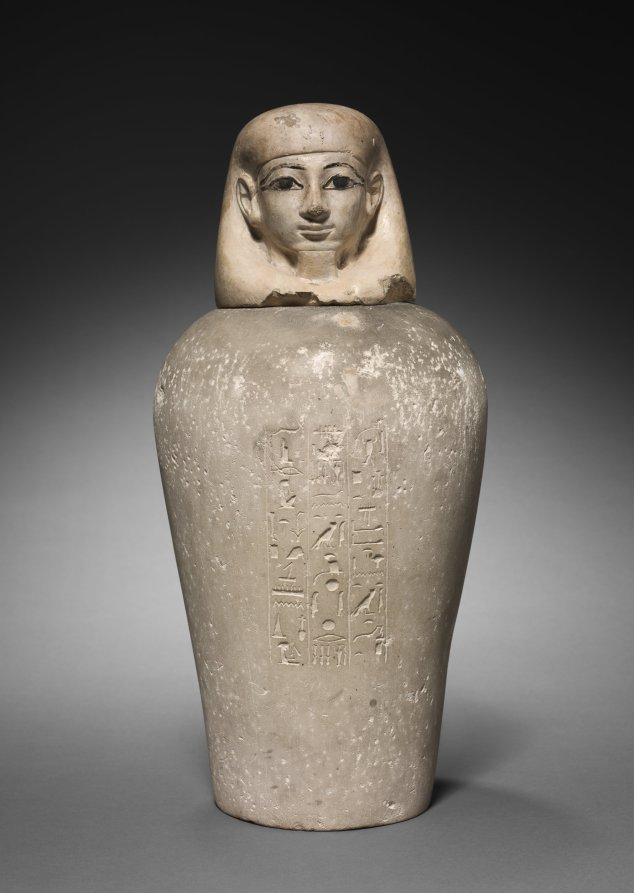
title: Canopic Jar with Lid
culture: Egypt, New Kingdom (1540–1069 BCE), Dynasty 18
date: 1540–1296 BCE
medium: limestone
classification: Funerary Equipment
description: Embellished tulle strips delicately wrap around the length of the Dior gown like linen covering a mummified body. As European artists in the 1800s who journeyed to Egypt drew what they saw, for the Dior collection he designed, John Galliano sketched his experiences in Egypt to develop this theatrical collection, merging additional inspirations of medical bandages and fetish fashion. In ancient Egypt, mummification was the most sacred practice performed. Rituals, such as removing organs and placing them in canopic jars, like the one here, and wrapping bodies and putting them in coffins, helped ensure the deceased’s safe passage into the afterlife.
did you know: Canopic jars are named after the Greek sailor Canopus, who was said to be buried at Canopus (Abuqir) in the western Nile delta and worshipped there in the form of a human-headed jar that was actually a form of Osiris and had nothing to do with internal organs. But the term has stuck.